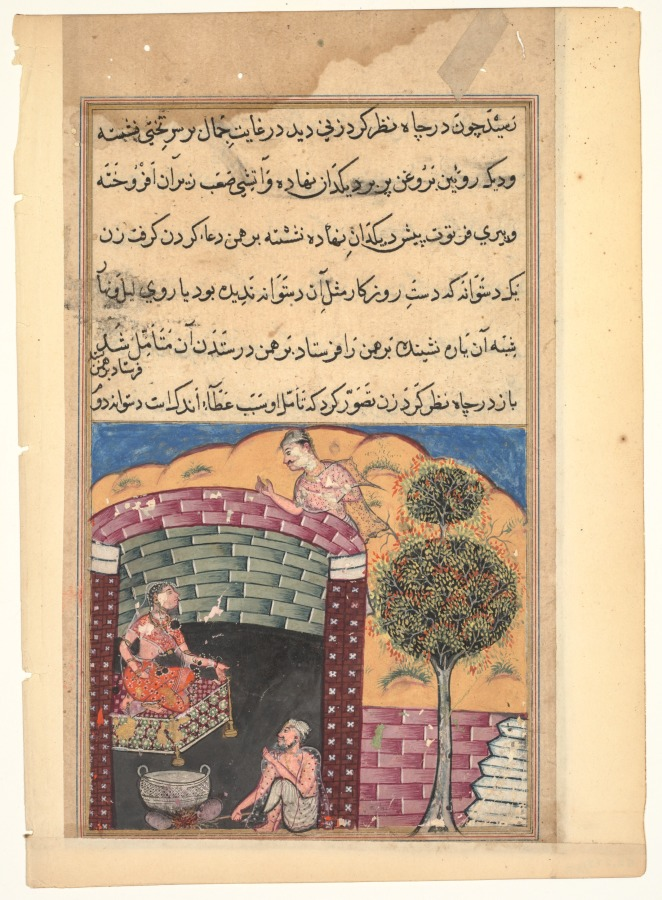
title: The Brahman gambler sees the daughter of the king of the jinns in a pit together with an old man and a cauldron of boiling oil, from a Tuti-nama (Tales of a Parrot: Seventh Night)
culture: Mughal India, court of Akbar (reigned 1556–1605)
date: c. 1560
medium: gum tempera, ink, and gold on paper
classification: Painting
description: A destitute Brahman peers into an open pit. At the bottom, he sees a beautiful woman and her elderly lover, who has stoked the fire beneath the cauldron for nearly eighty years. She gives the Brahman two gold bracelets, which he holds in each hand. The pit is represented in cross-section, allowing the viewers to see the action inside.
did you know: The advanced age of the old man is signaled by his black and white beard.